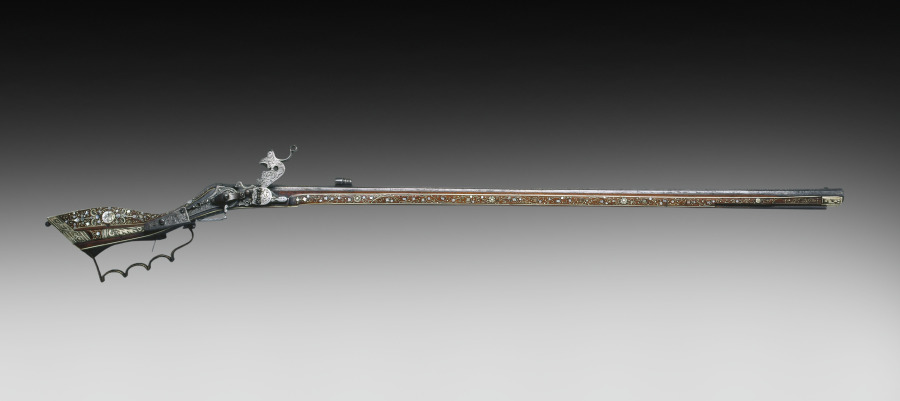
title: Tschinki (Wheel-Lock Hunting Rifle)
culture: Poland, Silesia, 17th century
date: c. 1630–50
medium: steel with traces gilding; walnut stock inlaid with bone, stag horn, mother-of-pearl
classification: Arms and Armor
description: This type of hunting gun owes its name to the town of Teschen in Silesia (now southern Poland) which, as early as 1580, was already associated with a particular type of gun. The precise date of the invention of the Tschinke is unknown, though a dated example of 1610 survives in the Imperial Armouries in Vienna.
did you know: At over four feet long, this rifle's scale is only outdone by the fine details of the gilding and inlaid precious materials. This weapon is known for the region in which it was made and popularized.